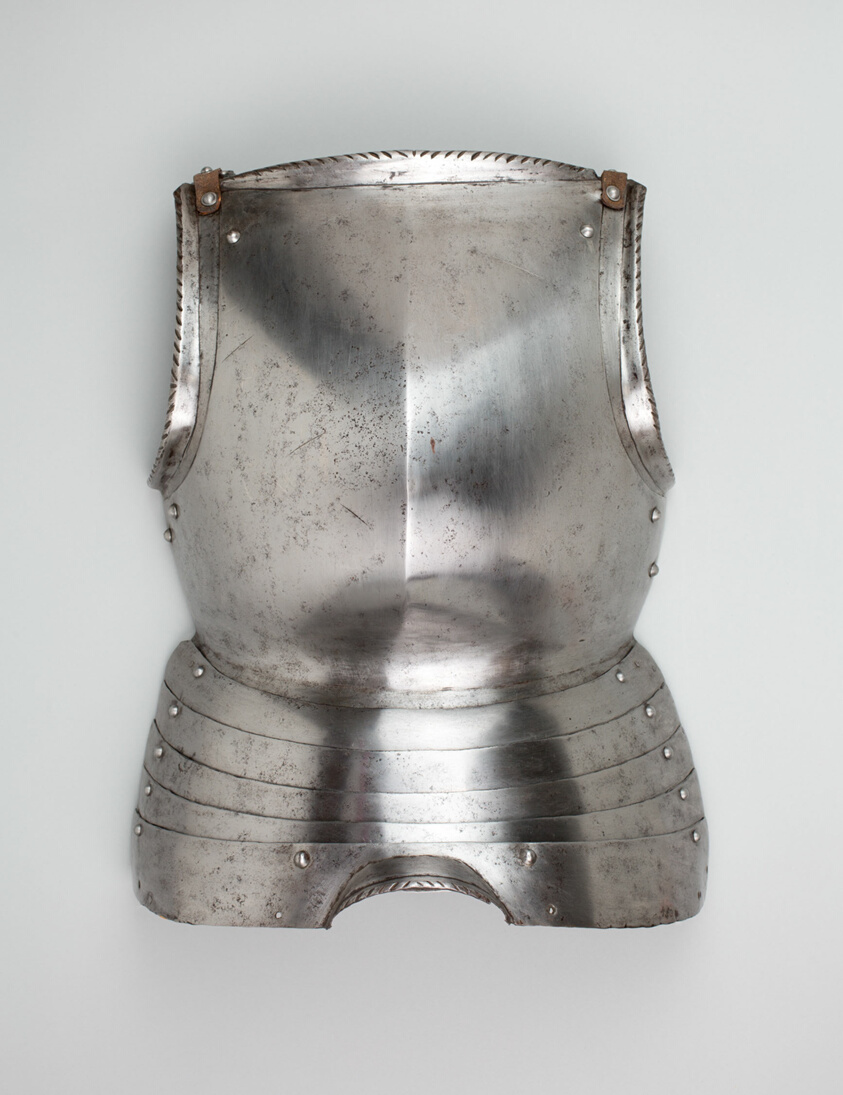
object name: Armor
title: Breastplate with Associated Fauld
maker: Italian (?), possibly German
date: c. 1530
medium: Steel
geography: Italy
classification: suit-element; armor; arms and armor